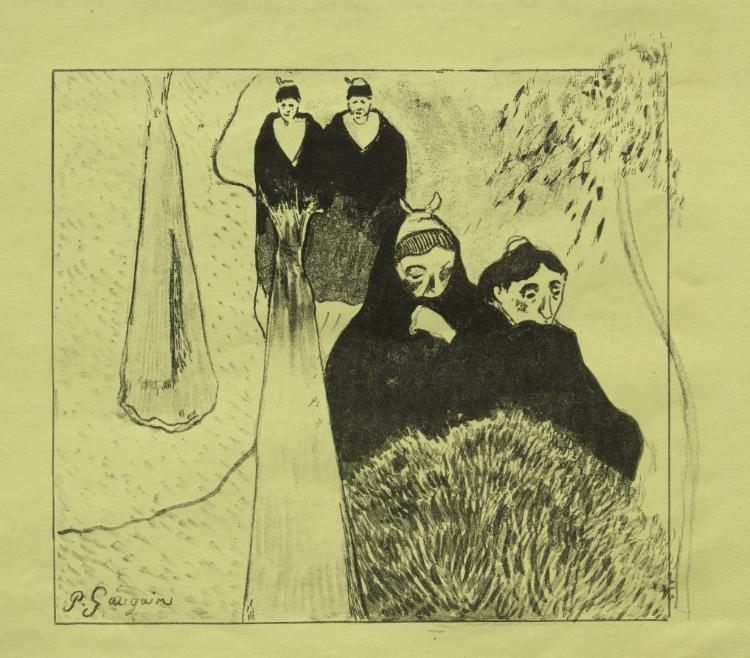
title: Volpini Suite: Old Women of Arles (Les Vieilles Filles [Arles])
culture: France, 19th century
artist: Paul Gauguin (French, 1848–1903)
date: 1889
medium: zincograph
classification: Print